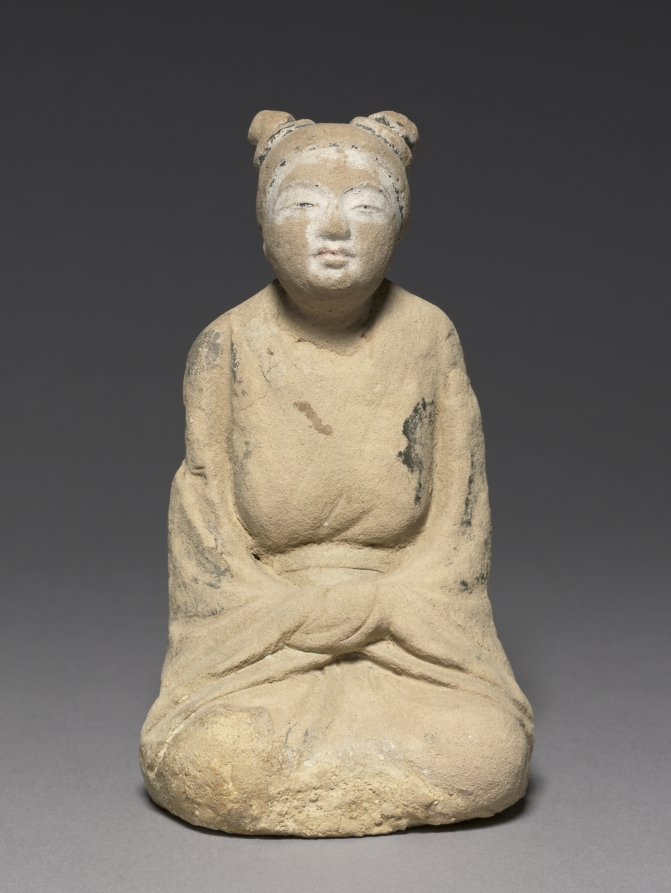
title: Woman from an Audience Scene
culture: Japan, Asuka period (538-710) to Nara period (710-94)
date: mid-600s to early 700s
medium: unfired clay with color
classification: Sculpture